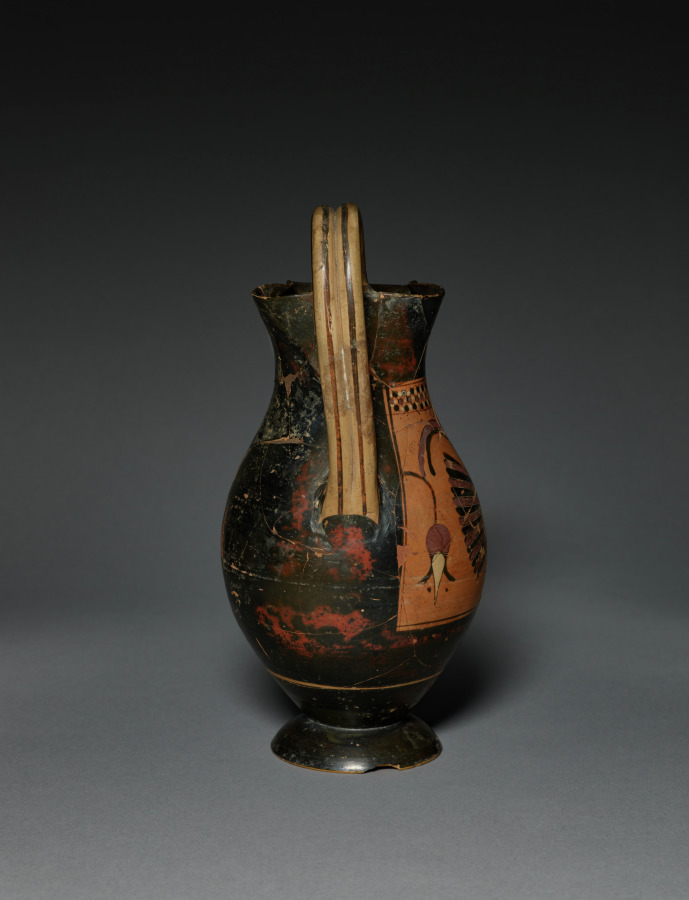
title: Black-Figure Olpe (Wine Jug): Rooster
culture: Greek, Middle/Late Corinthian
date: c. 575 BCE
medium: ceramic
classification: Ceramic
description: Although this wine jug, simply decorated with a rooster and two lotus blossoms, looks much like Athenian vases, it was made in Corinth. The paler buff color of the Corinthian clay can be seen on the handle and in some areas of loss, but the background of the decorated area has been covered with a red slip imitating the reddish, iron-rich Attic (or Athenian) clay. On the back of the vase, two reserved (red) crescent shapes may represent eyes, like those painted in much more detail on many drinking cups of this period.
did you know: Roosters appear frequently on vases—alone, in cock fights, and as love gifts.